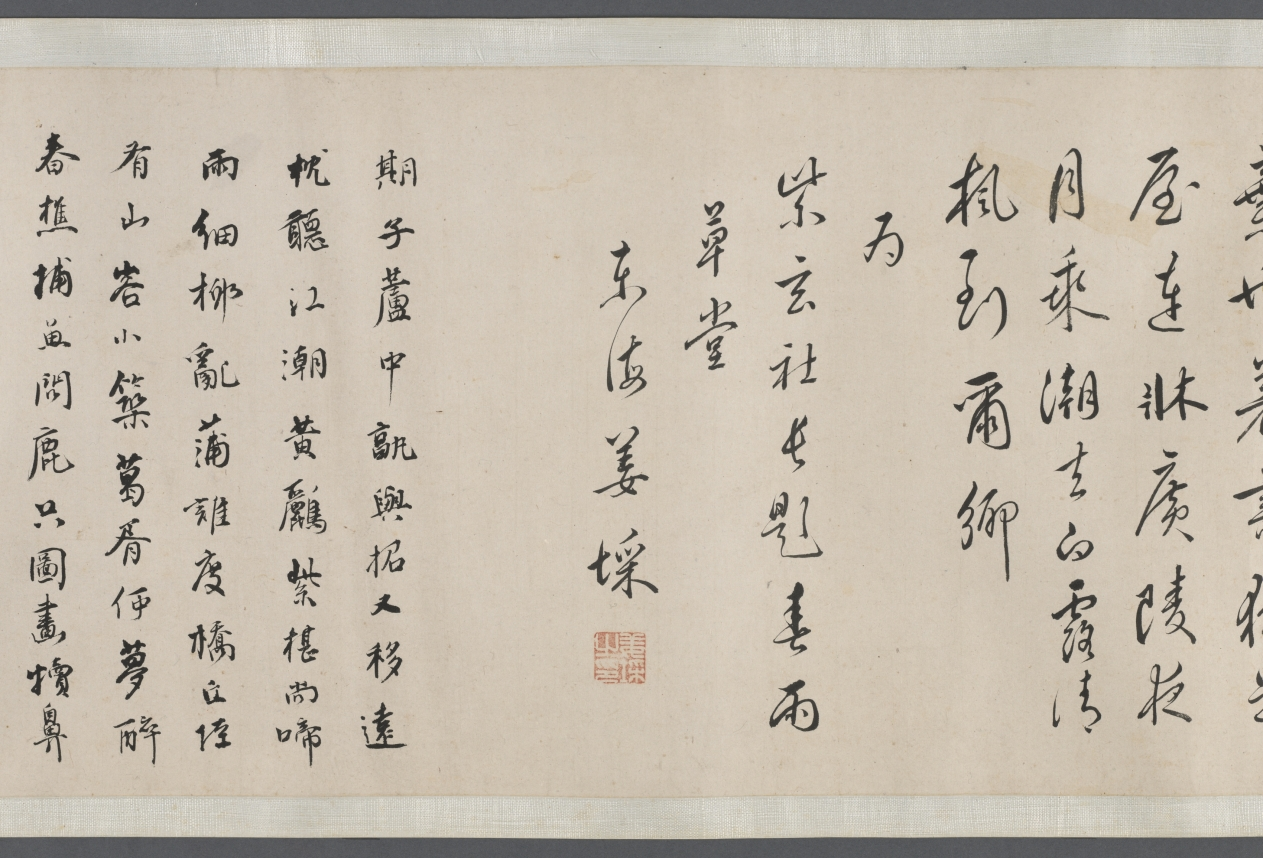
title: Spring Rain Thatched Hut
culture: China, Qing dynasty (1644-1911)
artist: Wang Jianzhang (Chinese, active 1621–1662)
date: 1650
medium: handscroll, ink on paper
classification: Drawing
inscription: Title by Wu Zhiying 吳芝瑛 (1868–1933), dated 1910.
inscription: 春雨草堂圖。庚寅仲春，為紫玄社兄畫於若耶溪上。 仲初王建章。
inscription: 12 colophons by Gong Weiliu’s 宮偉鏐 (1611–1680) contemporaries: Fang Gongqian 方拱乾 (1596–1667, jinshi of 1628); Jiang Cai 姜埰 (1607–1673); Liang Yizhang 梁以樟 (1608–1665); Du Shaokai 杜紹凱 (also named Du Jie 杜岕, 1617–after 1689), dated 1648; Zhao Kaixin 趙開心 (d. 1663), dated 1647; Zhao Erbian 趙而忭 (d. 1658); Yu Yaoguang 余耀光, dated 1649; Yao Quan 姚佺, dated 1648; Chen Taisun 陳台孫 (b. 1611, jinshi of 1640); (Monk) Shao 韶; Du Zhujin 杜祝進; and Tang Shi 唐時.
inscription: 此研田莊居士王建章為先太史紫元公所作春雨草堂圖也。居士字仲初，明崇禎間人，與先太史及惲香山相友善。喜畫佛像，自謂不讓李公麟。山水祖述董源，筆力雄健，有不可羈勒之概。香山稱其墨有五采，非世人所知。然性廉重，非同志不輕落筆，人得其寸圖尺縑，必相與忻賞，如獲蜼彝兕敦，非人世間物也！見先太史筆記，此圖寫雨景，而氣韻生動，勃勃於不能止。每一展覽，覺滿紙雲烟，墨瀋猶濕，如寫吾先人胸中未盡之邱壑也。圖後題詠，多一時名手，想見文采風流之盛。迄今二百餘年，舊德先疇，遺風未沫。吾子孫其永寶之，如與吾先人接謦咳於一堂，為感思之助，其敢作圖畫觀乎！同時香山亦有圖佚去己久，不知異日能為延津之合否。壬申長夏本昂重裝敬識。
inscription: Collectors' seals including: Gong Ben'ang 宮本昂 (1821–1874); Lian Qian 廉泉 (1868–1932); Wu Zhiying 吳芝瑛 (1868–1933)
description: With its striking simplicity, this painting captures the pure serenity of a private garden in the moist atmosphere of a spring morning on a small river. Painted in the style of Ni Zan, Wang Jianzhang dedicated this work to his patron-friend Gong Weiliu (1611-1680). Gong retired from government service after the fall of the Ming dynasty and constructed a garden-retreat at his native home in Taizhou, Jiangsu province. He invited scholars and poets from his literary society to contribute writings of his estate, which are here mounted together with the painting in this scroll.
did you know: Gong Weiliu, the owner of the estate portrayed here, had received his prestigious jinshi degree in 1643, but his official career was thwarted by the collapse of the Ming dynasty the following year.